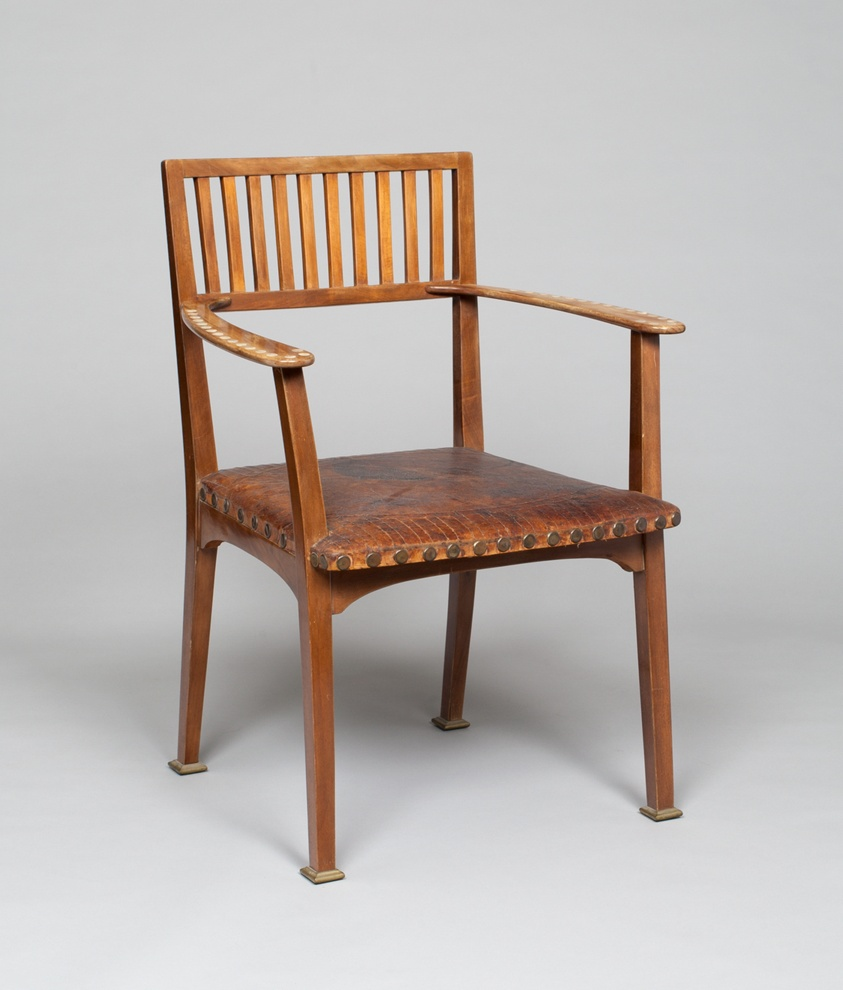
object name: Furniture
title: Armchair No. 8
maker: Designed by Otto Wagner (Austrian, 1841-1918); Austria, Vienna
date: 1898/99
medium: Polished walnut, mother–of–pearl, and brass with leather seat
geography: Austria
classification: seating; furniture; european decorative arts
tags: furniture